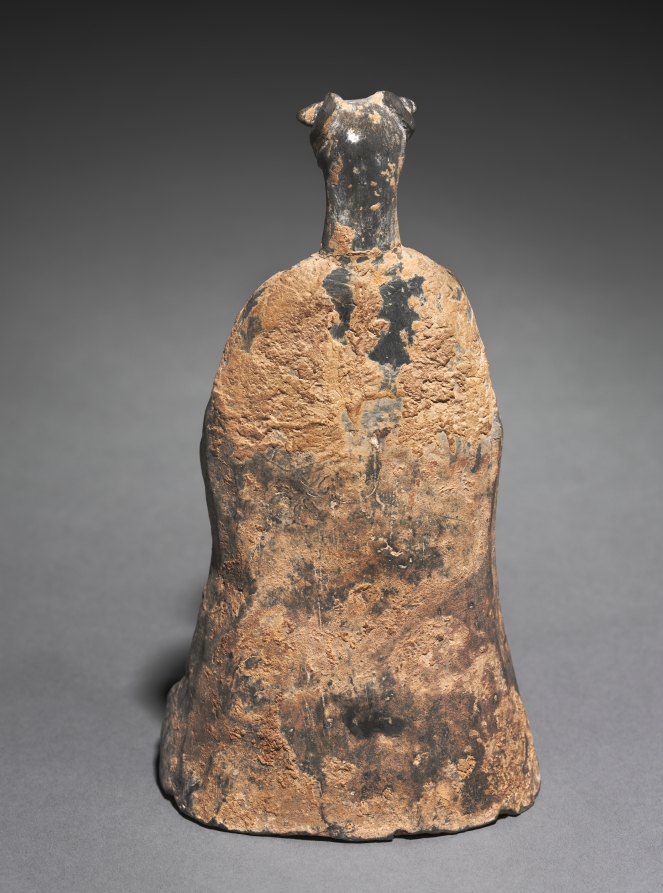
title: Mortuary Figure of the Zodiac Sign: Sheep (Scorpio)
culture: China, Northern Wei dynasty (386-534)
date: 500s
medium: gray earthenware with traces of slip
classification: Sculpture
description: The twelve-animal zodiac series—rat, ox, tiger, rabbit, dragon, snake, horse, goat, monkey, rooster, dog, and boar—signifies a traditional Chinese concept of time structured in a cyclical order. The twelve animals are also linked to the art of fortune-telling that underlies human existence in connection with the changes of the universe. The use of the twelve zodiac animals as tomb furniture suggests they provided a cosmological structure for the afterlife.